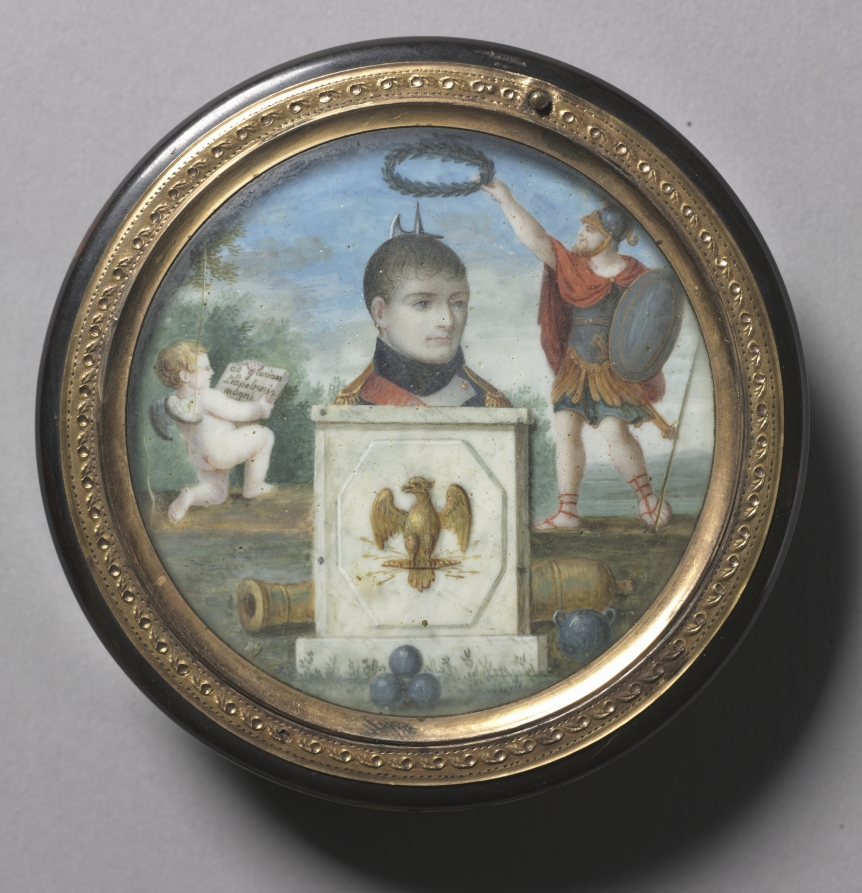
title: Snuff Box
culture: Switzerland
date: early 1800s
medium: tortoiseshell with painted automaton miniature under glass mounted in gold on gilt metal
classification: Miscellaneous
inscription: the putto on the left holds a tablet bearing the inscription: "ad gloriam Napoleonis magni" (glory to the great Napoleon).